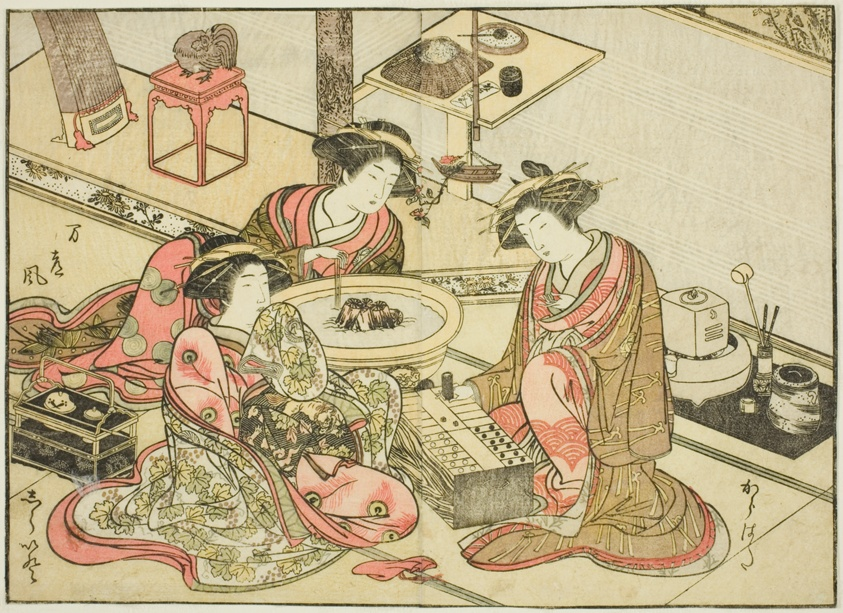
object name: Print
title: Courtesans of the Yamashiroya, from the book "Mirror of Beautiful Women of the Pleasure Quarters (Seiro bijin awase sugata kagami)," vol. 2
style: Japanese (culture or style)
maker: Katsukawa Shunsho; Japanese, 1726-1792; Kitao Shigemasa; Japanese, 1739-1820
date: 1776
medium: Color woodblock print; double-page illustration cut from a book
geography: Japan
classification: woodblock print; print; asian art